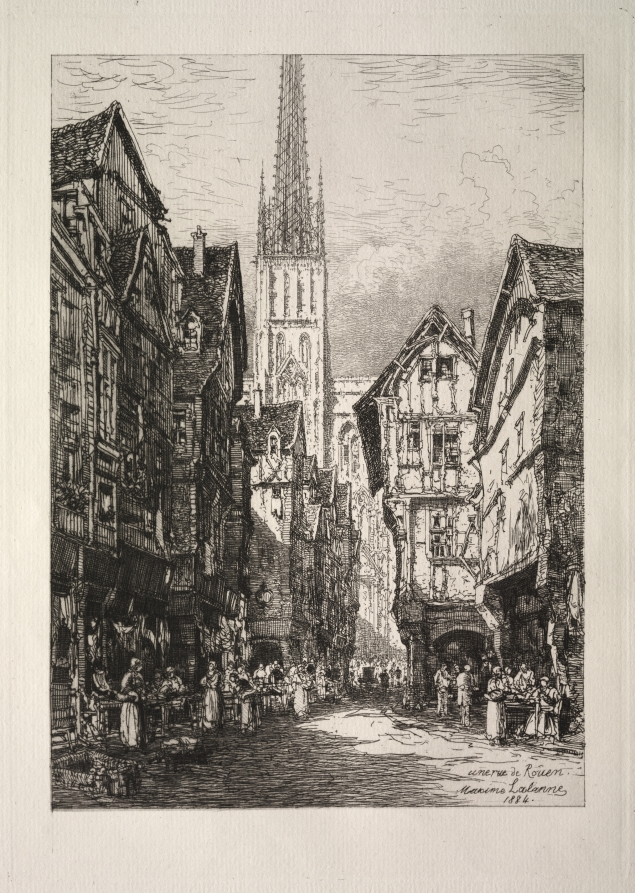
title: A Street in Rouen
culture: France, 19th century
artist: Maxime Lalanne (French, 1827–1886)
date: 1884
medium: etching on chine collé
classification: Print